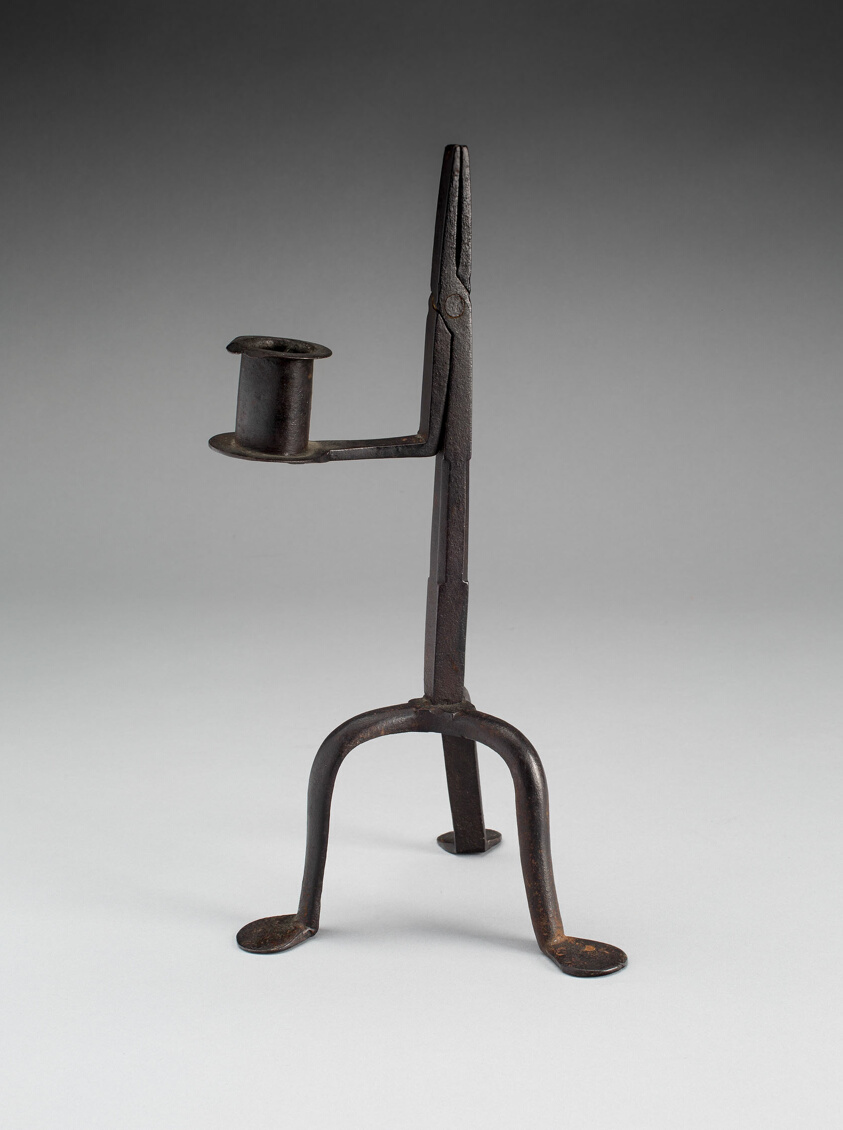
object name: Decorative Arts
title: Candlestick and Rushlight Holder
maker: Artist unknown (American, active 18th–19th century)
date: 1750–1850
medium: Iron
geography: United States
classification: metalwork; american decorative arts; american arts; decorative arts